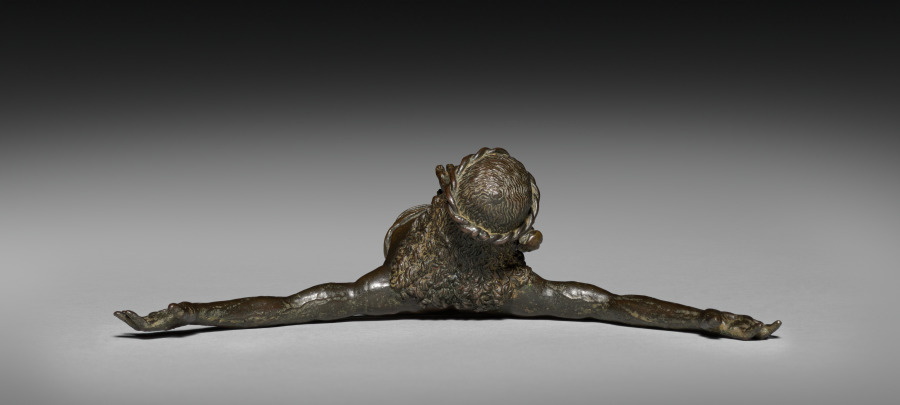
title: Crucified Christ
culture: Italy, Ravenna, 16th century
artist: Severo da Ravenna (Italian, c.1496–c.1543)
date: c. 1500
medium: bronze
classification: Sculpture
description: The highly finished surface of this sculpture, including the back, suggests it belonged to a refined collector. Small sculptures would often be held to admire details such as the strands of hair streaming onto Christ’s shoulders, the prominent veins in his forearms, and the intricate knotted cloth at his side.